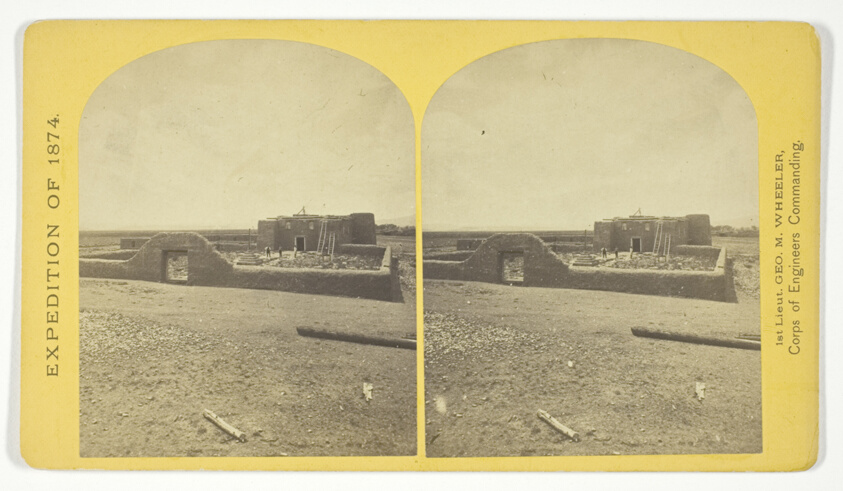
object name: Photograph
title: Roman Catholic Church, Plaza of Guadaloupe, Guadaloupe Co., Colorado. Built not many years since of adobes. Dimensions, length 120 feet; width 60 feet; height 25 feet. Grave yard in the foreground surrounded by an abode wall about 6 feet in height, No. 34 from the series "Geographical Explorations and Surveys West of the 100th Meridian"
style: 19th century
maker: Timothy O'Sullivan (American, born Ireland, 1840–1882); commissioned by George Wheeler for the War Department, Corps of Engineers, U.S. Army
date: 1874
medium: Albumen print, stereo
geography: United States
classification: stereograph (albumen); photography; photograph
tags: Collected by Hugh Edwards, Geographical Explorations and Surveys